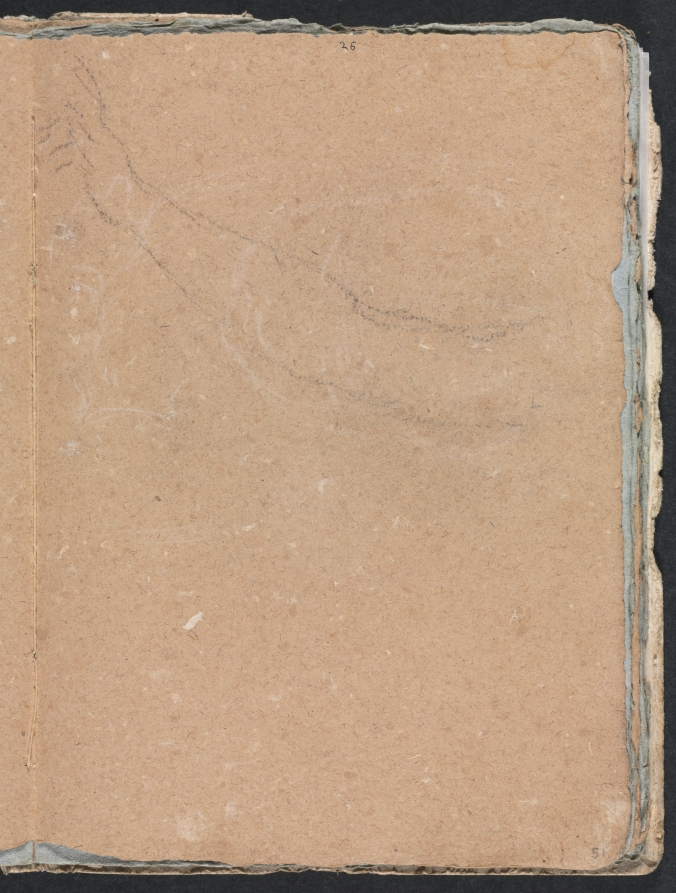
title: Verona Sketchbook: Arm (page 51)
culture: Italy, 18th century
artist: Francesco Lorenzi (Italian, 1723–1787)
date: 1760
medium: black chalk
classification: Bound Volume